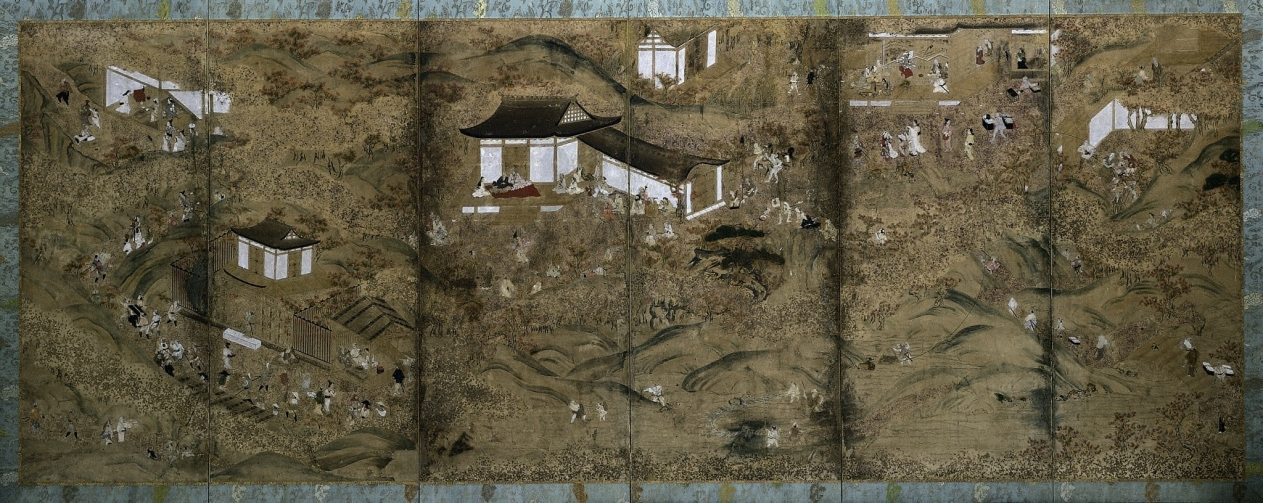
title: Autumn in the Mountains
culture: Japan, Edo period (1615–1868)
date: 1600s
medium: six-fold screen; ink and color with applied silver and gold leaf on paper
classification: Painting